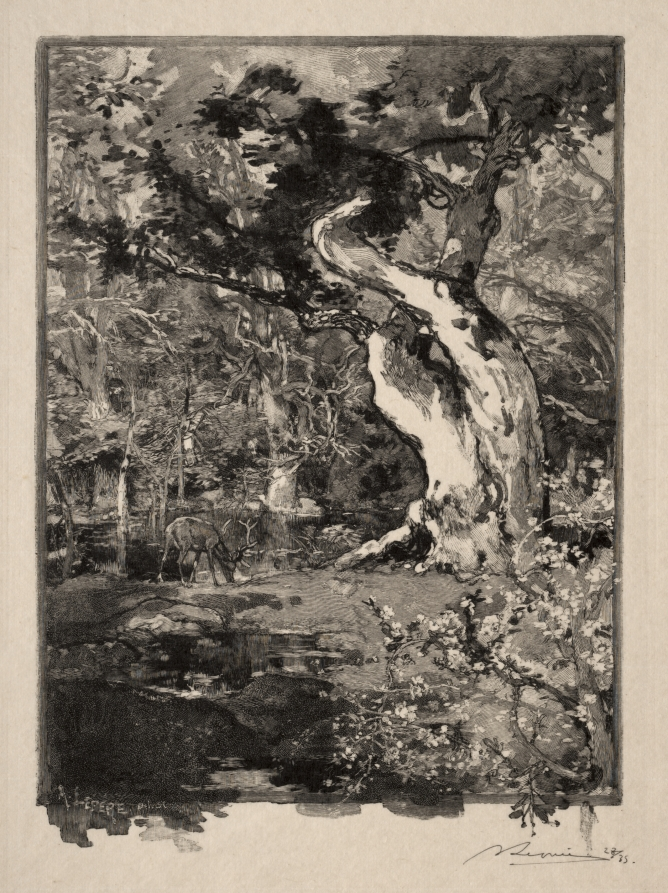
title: Le Clovis, Plateau de Bellecroix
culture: France, 19th century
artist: Auguste Louis Lepère (French, 1849–1918)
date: 1890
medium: wood engraving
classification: Print